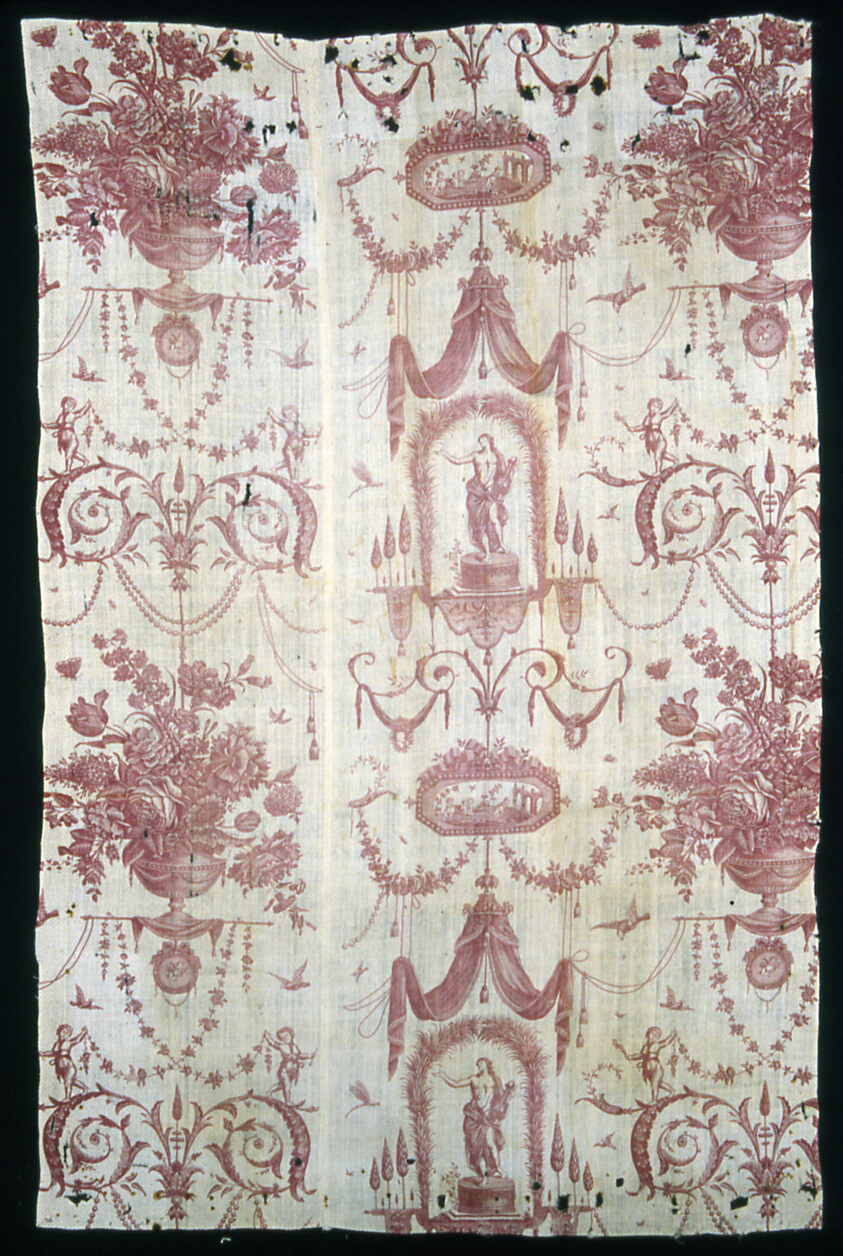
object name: Textile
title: Panel (Furnishing Fabric)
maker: France, Nantes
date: 1785/90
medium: Cotton, plain weave; copperplate printed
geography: Nantes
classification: textile; weaving - printed; furnishing textile